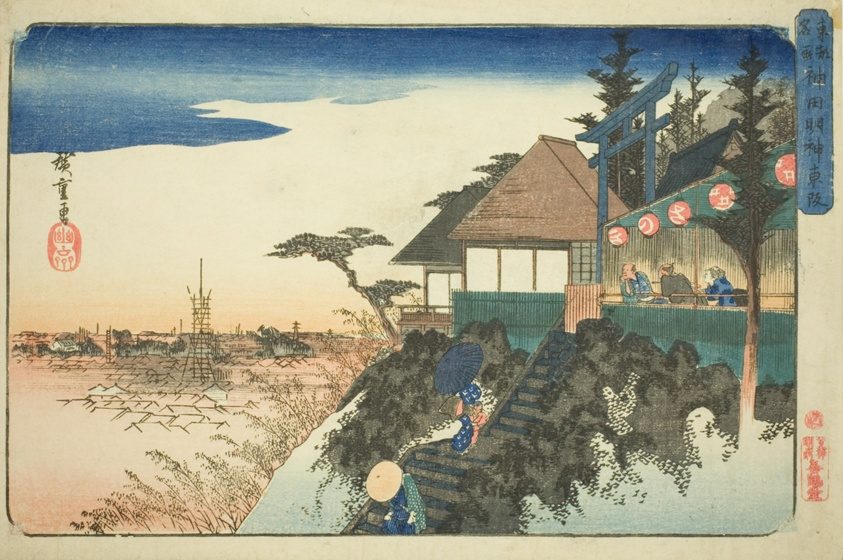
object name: Print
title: Eastern Ascent to the Kanda Myojin Shrine (Kanda Myojin higashizaka), from the series "Famous Places in the Eastern Capital (Toto meisho)"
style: Japanese (culture or style)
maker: Utagawa Hiroshige 歌川 広重; Japanese, 1797-1858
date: c. 1832/38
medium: Color woodblock print; oban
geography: Japan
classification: woodblock print; print; asian art